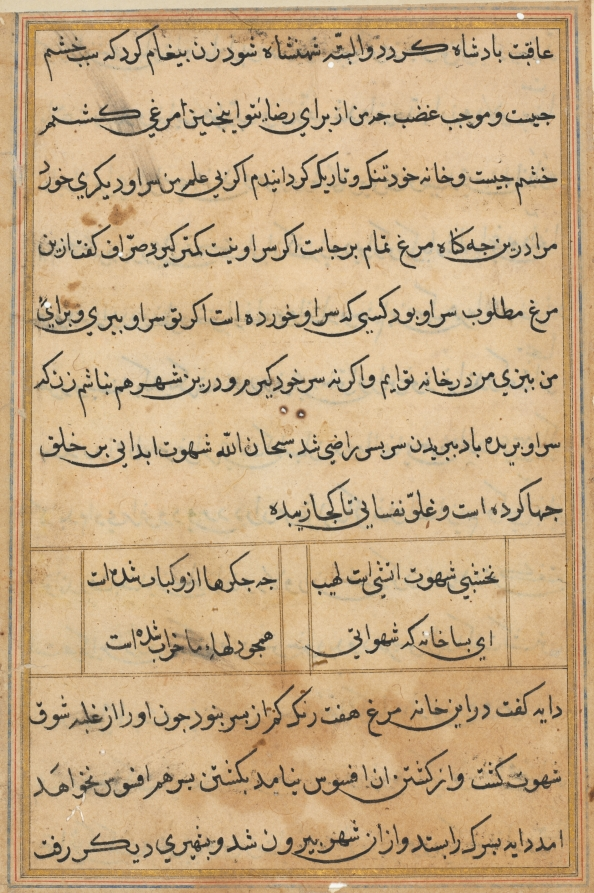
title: Page from Tales of a Parrot (Tuti-nama): text page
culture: Mughal India, court of Akbar (reigned 1556–1605)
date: c. 1560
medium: gum tempera, ink, and gold on paper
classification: Painting